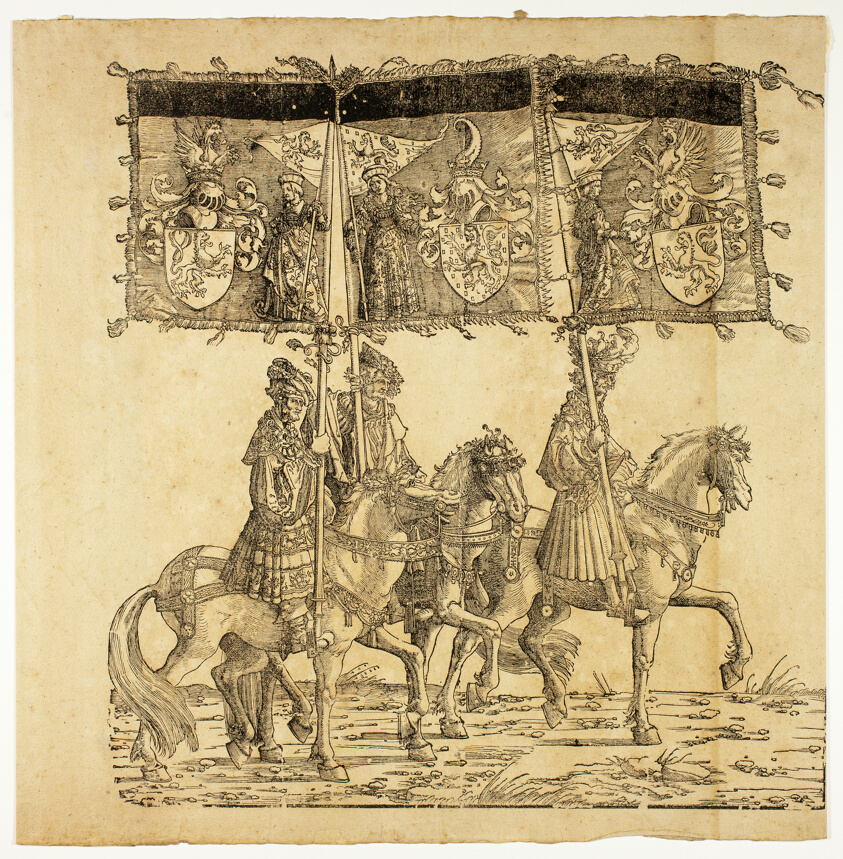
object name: Print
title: Triumph of Maximilian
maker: Hans Burgkmair, the elder (German, 1473-1531)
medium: Woodcut on paper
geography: Germany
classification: print; prints and drawing